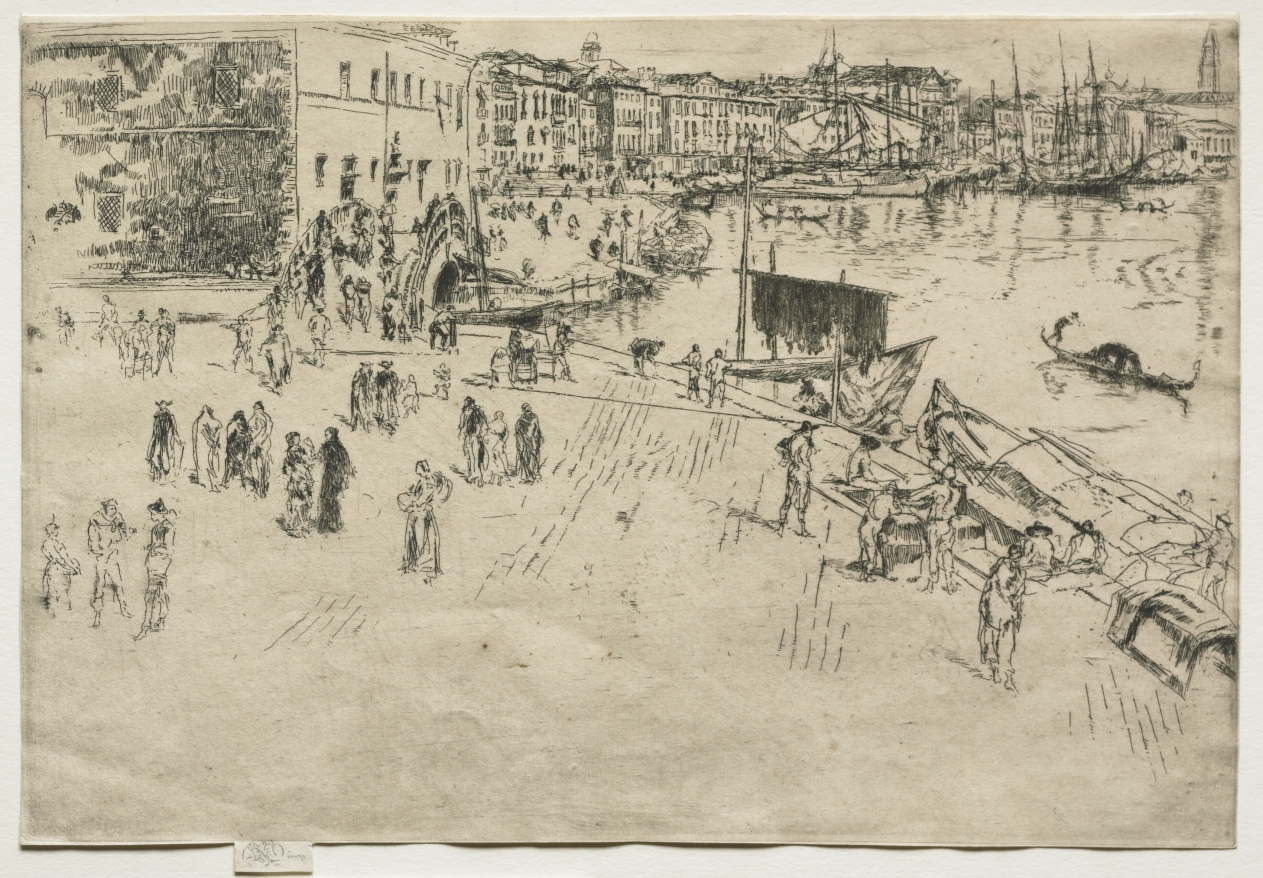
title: The Riva, No. 1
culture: America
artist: James McNeill Whistler (American, 1834–1903)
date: 1880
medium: etching and drypoint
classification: Print